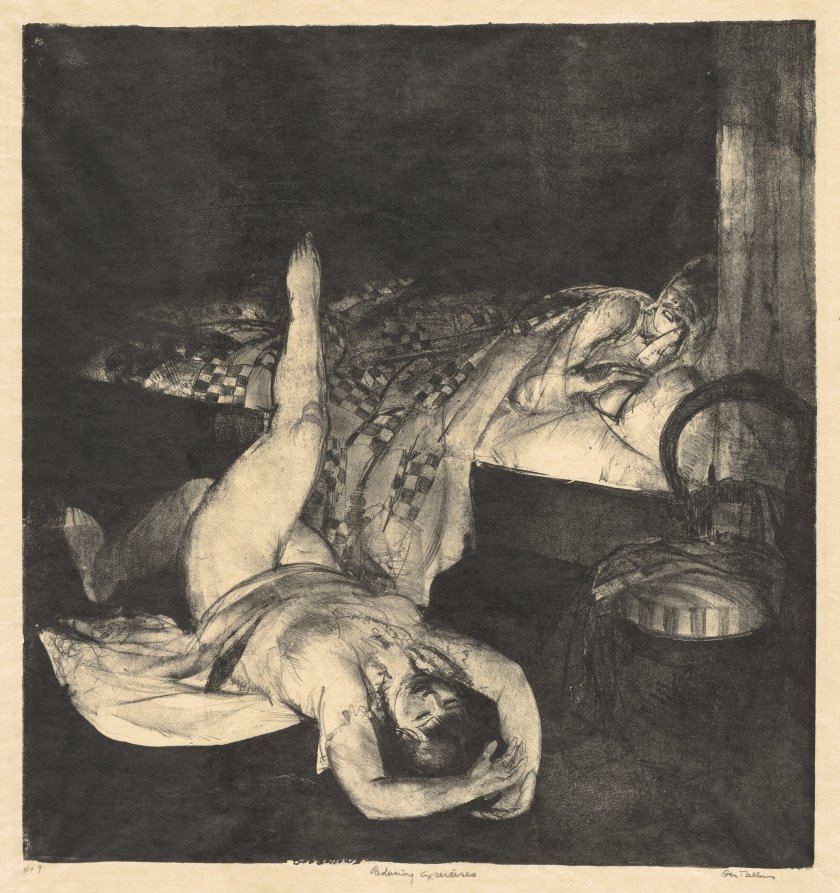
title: Reducing Exercises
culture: America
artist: George Bellows (American, 1882–1925)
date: 1916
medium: lithograph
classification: Print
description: Fueled by the advertising industry and the increasing popularity of movies, the ideal standard for women’s bodies began to evolve during the early 20th century, fostering a preference for more curvaceous profiles with thinner waists. Bellows’s Reducing Exercises presents a woman dutifully engaged in changing her physique while her male companion sleeps. When he first exhibited the print, the artist provided an accompanying quip: “Gymnastics before retiring are supposed to reduce the flesh. The husband is contented with his figure.”